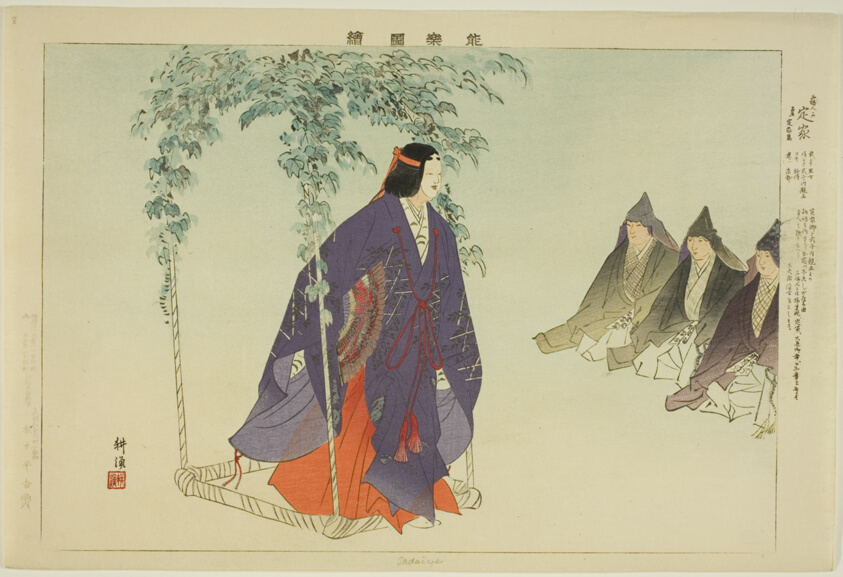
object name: Print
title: Sadaiye, from the series "Pictures of No Performances (Nogaku Zue)"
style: Japanese (culture or style)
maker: Tsukioka Kogyo; Japanese, 1869-1927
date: 1898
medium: Color woodblock print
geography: Japan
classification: woodblock print; print; asian art